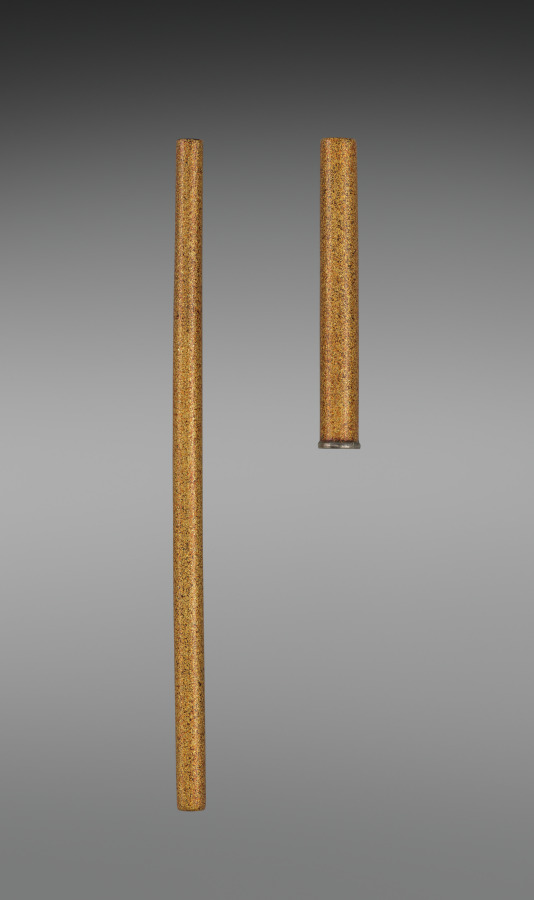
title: Writing Box (Suzuribako) with the “First Song” (Hatsune) Chapter from the Tale of Genji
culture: Japan, Meiji period (1868–1912)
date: early 1900s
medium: Lacquered wood with gold and silver sprinkled powder (maki-e), foil application (kirikane), and metal inlay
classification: Lacquer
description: The design of this box was inspired by an object in the 1639 lacquer wedding set of Chiyohime, the daughter of the shogun (ruler). Information about the set became available in the Meiji period, leading some lacquer artists to emulate its designs. This box features a scene from the chapter “First Song” (Hatsune) of the Tale of Genji, in which Prince Genji and his love Murasaki enjoy her garden. It incorporates the written characters for “first” (初, hatsu) and “sound” (音, ne), indicating the first song of the warbler in spring, associated with the new year—the water dropper for mixing the ink is in the shape of this bird.